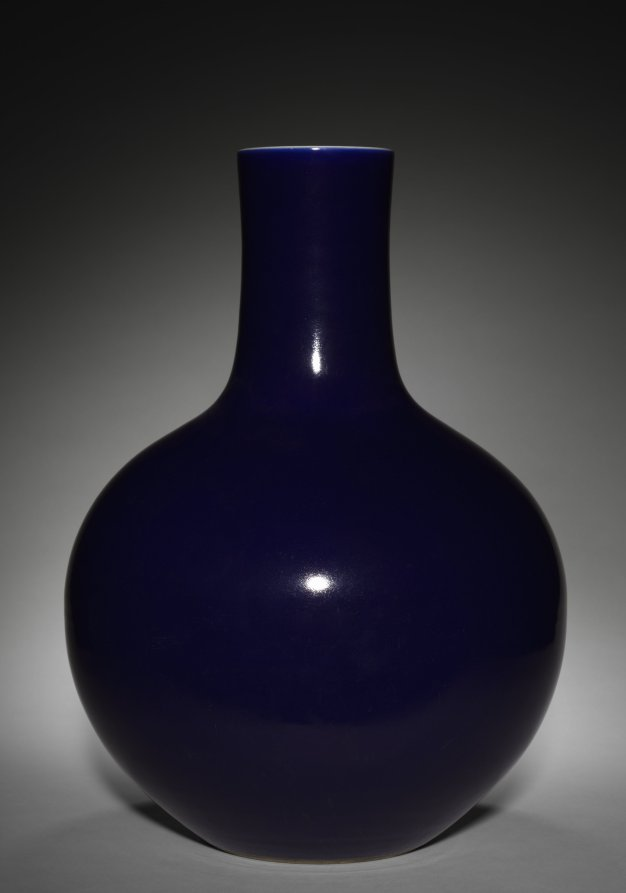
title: Blue Bottle Vase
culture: China, Qing dynasty (1644-1911), Qianlong mark and reign (1736-95)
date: 1736–95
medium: porcelain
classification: Ceramic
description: In the Qing dynasty (1644–1911), luxury items became more affordable to larger parts of the society, including women, merchants, and literati in non-official positions. Imperial patronage and a growing urban population encouraged consumption of luxury goods and local craftmanship. This blue bottle vase exemplifies the technical perfection of Qing dynasty court artisans who surpassed their predecessors in technical skill.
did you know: The vase's lip top, inside, and bottom were glazed with bluish-white with tiny dark speckles.